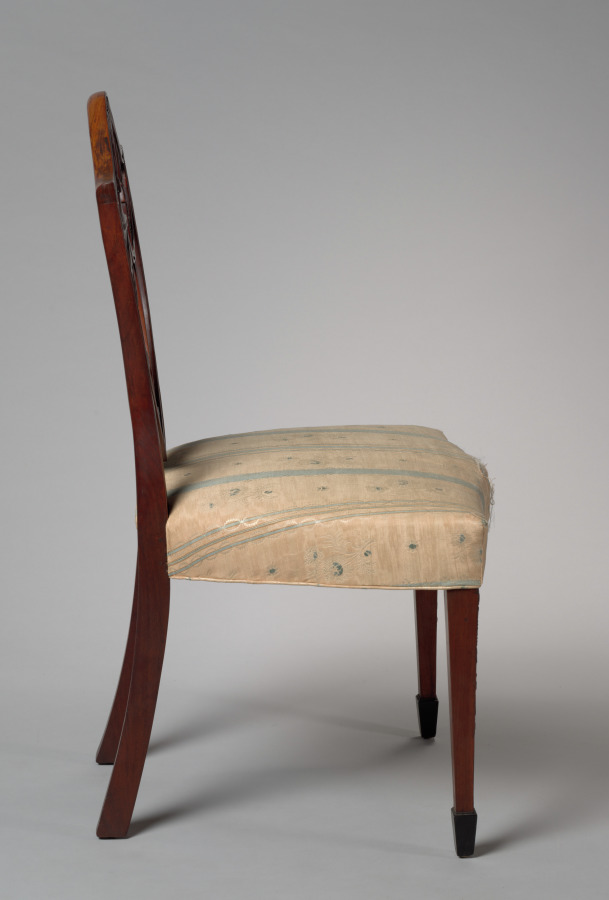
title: Chair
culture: America, Salem, early 19th Century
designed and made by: attributed to Samuel McIntire (American, 1757–1811)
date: c. 1800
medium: mahogany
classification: Furniture and woodwork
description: This chair exemplifies the neoclassic style in America. Design books published by British cabinetmakers transmitted the style to the New World. Indeed, Samuel McIntire found inspiration for this chair in Plate 2 from the 1794 edition of George Hepplewhite's Cabinetmaker and Upholsterer's Guide. The McIntire chair's shield-shaped back, however, is pointed rather than rounded, and the front legs, enriched with carved grapevines, have tapered "spade" feet with ebony applied. McIntire's carving skill brought him great success in Salem, a town half the size of Boston, but where some of the finest furniture of the period was made. This chair comes from a set owned by the Derby family, one of the most prominent in Salem.